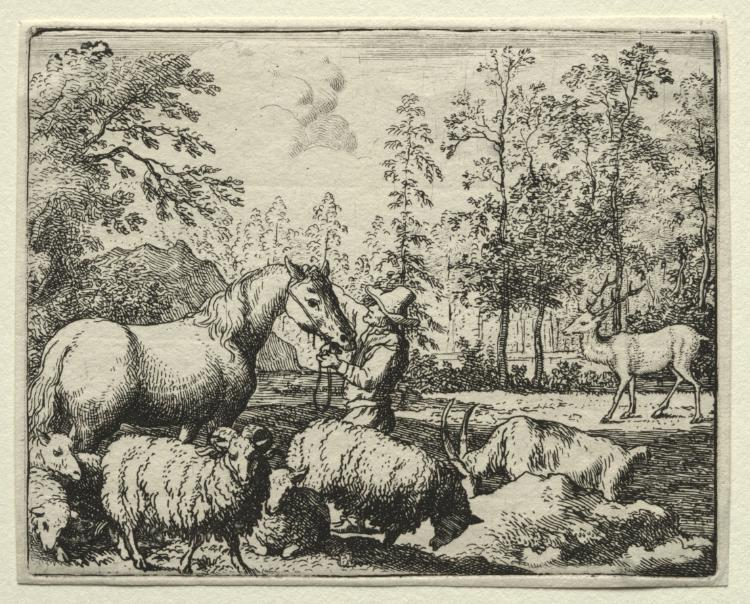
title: Reynard the Fox: The Jealous Horse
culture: Netherlands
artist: Allart van Everdingen (Dutch, 1621–1675)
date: 1650–75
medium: etching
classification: Print